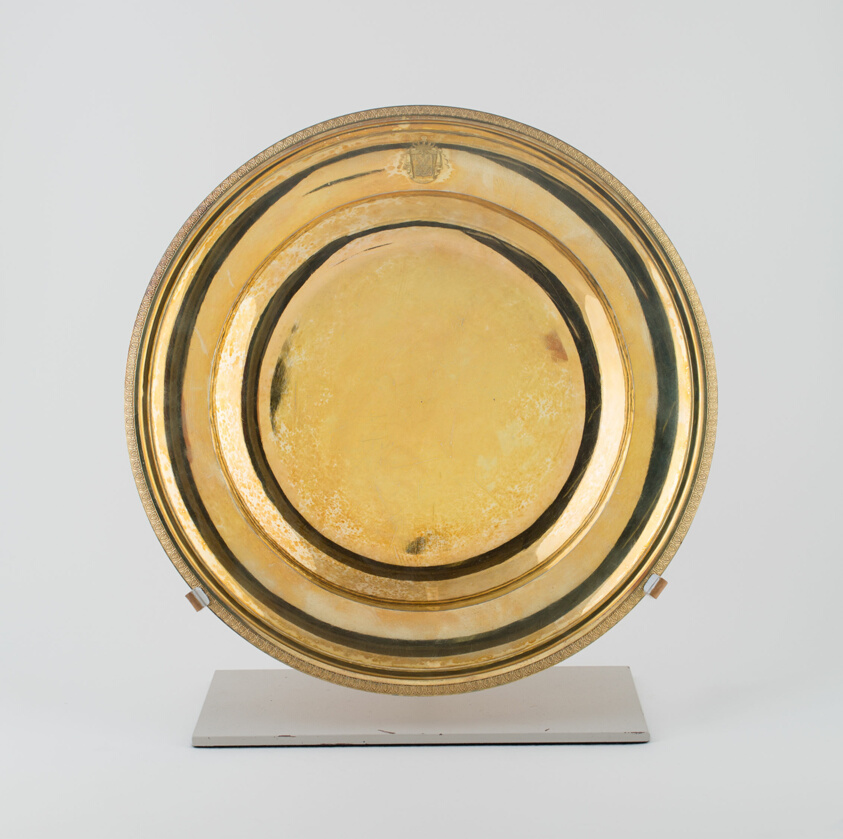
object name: Metalwork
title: Pair of Circular Platters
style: napoleonic, empire, Neoclassicism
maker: Martin-Guillaume Biennais (French, 1764–1843); Paris, France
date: c. 1809–19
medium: Gilt silver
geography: Paris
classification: dish (vessel); silver; vessel for serving food; metalwork; european decorative arts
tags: Borghese Service, dining, Napoleon